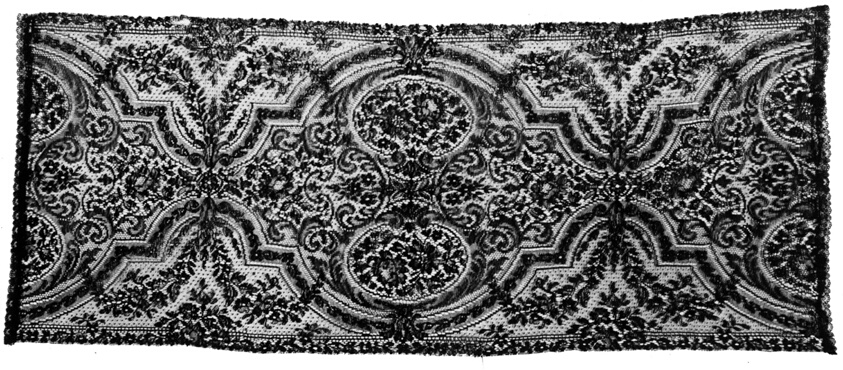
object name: Textile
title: Bonnet Veil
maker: England or France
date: 1875/1900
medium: Silk, Leavers machine lace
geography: England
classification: textile; lace - machine; costume; dress (garment); clothing